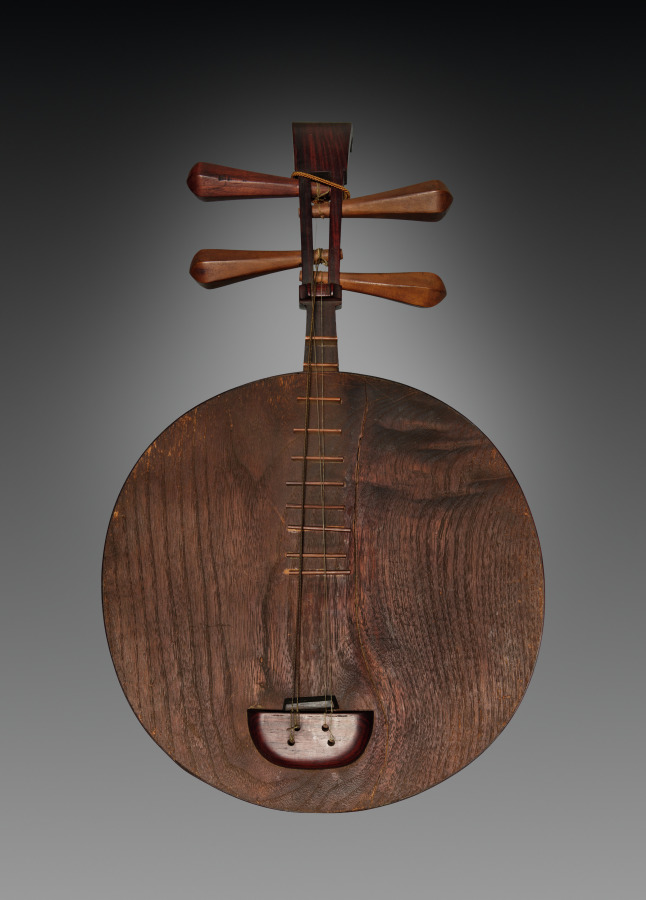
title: Moon Lute (Yueqin)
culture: China, Qing dynasty (1644-1911)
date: 1800s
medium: Rosewood, wutong (paulownia) wood, and gut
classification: Musical Instrument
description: Its resemblance to the full moon (yue 月) gives the yueqin its name. Found in popular ensembles, the Beijing and folk (jingxi) operas and used to accompany song, the yueqin has only recently been embraced by the modern Chinese orchestra. The player presses the strings between the frets making chord playing difficult but giving increased control over the timbre and intonation. Strings are plucked with fingernails or a pick using up-and-down strokes and tremolo techniques that sustain and provide color to a tone. It is known as gekkin in Japan.